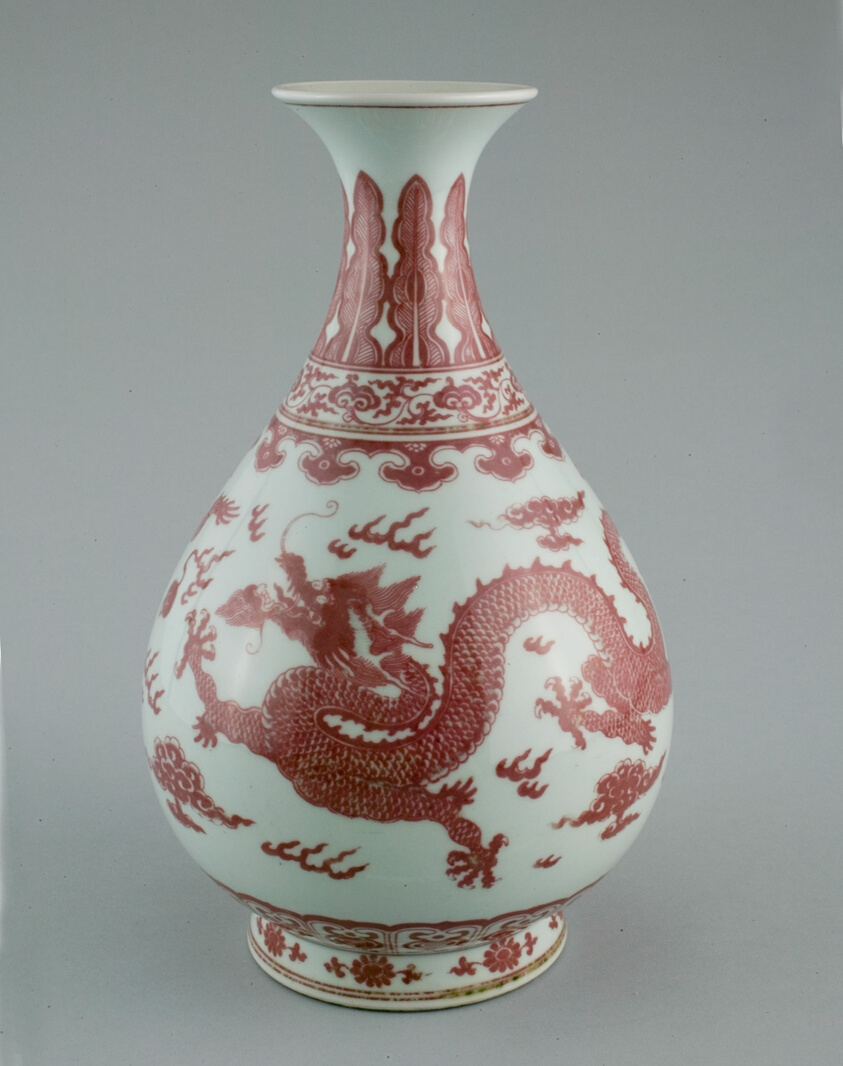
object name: Vessel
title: Bottle Vase with Dragons amid Clouds, Chasing Flaming Pearls; Pendant Ruyi; Lingzhi Scrolls; Upright Leaves and Petal Panels; and Florets Encircling Foot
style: Chinese (culture or style)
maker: China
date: Qing dynasty (1644–1911), Qianlong reign mark and period (1736–1795)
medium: Porcelain painted in underglaze red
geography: China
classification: vase; porcelain; vessel; asian art; ceramics